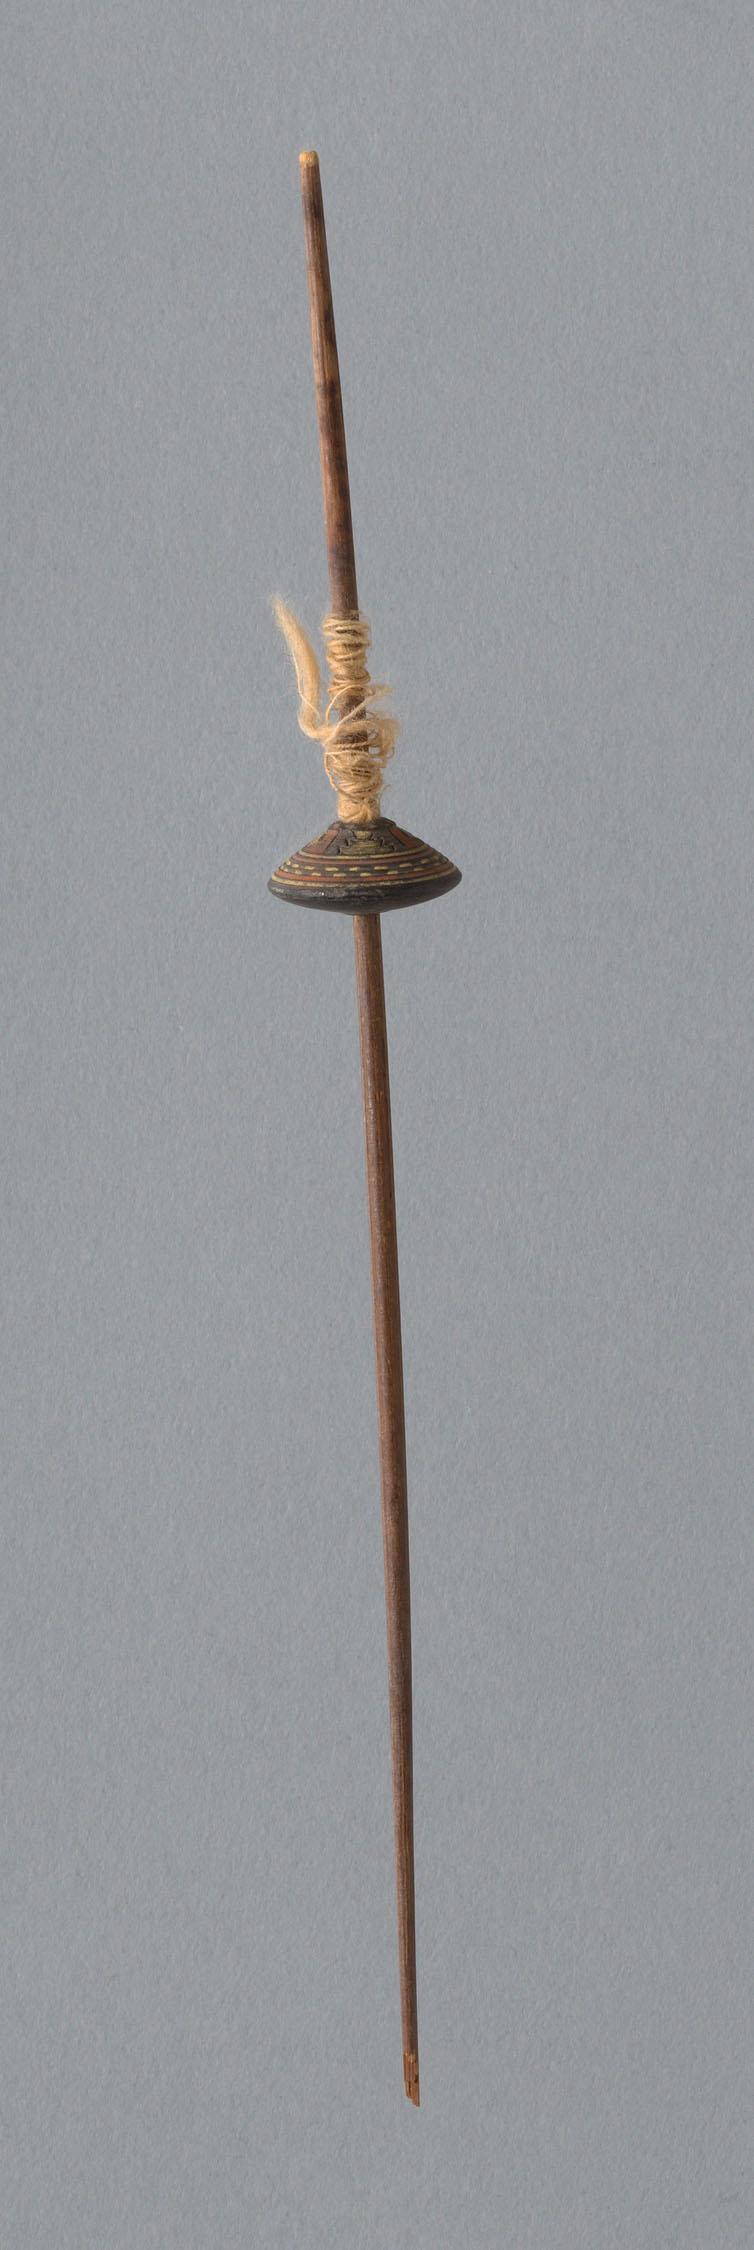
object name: non-art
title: Wooden Spindle with Ceramic Whorls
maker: Possibly central coast, Peru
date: 1000/1476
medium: Wood, polychrome ceramic, and cotton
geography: Peru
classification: textile working equipment; whorls (spindle flywheels); spindles (textile working equipment); textile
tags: super/natural